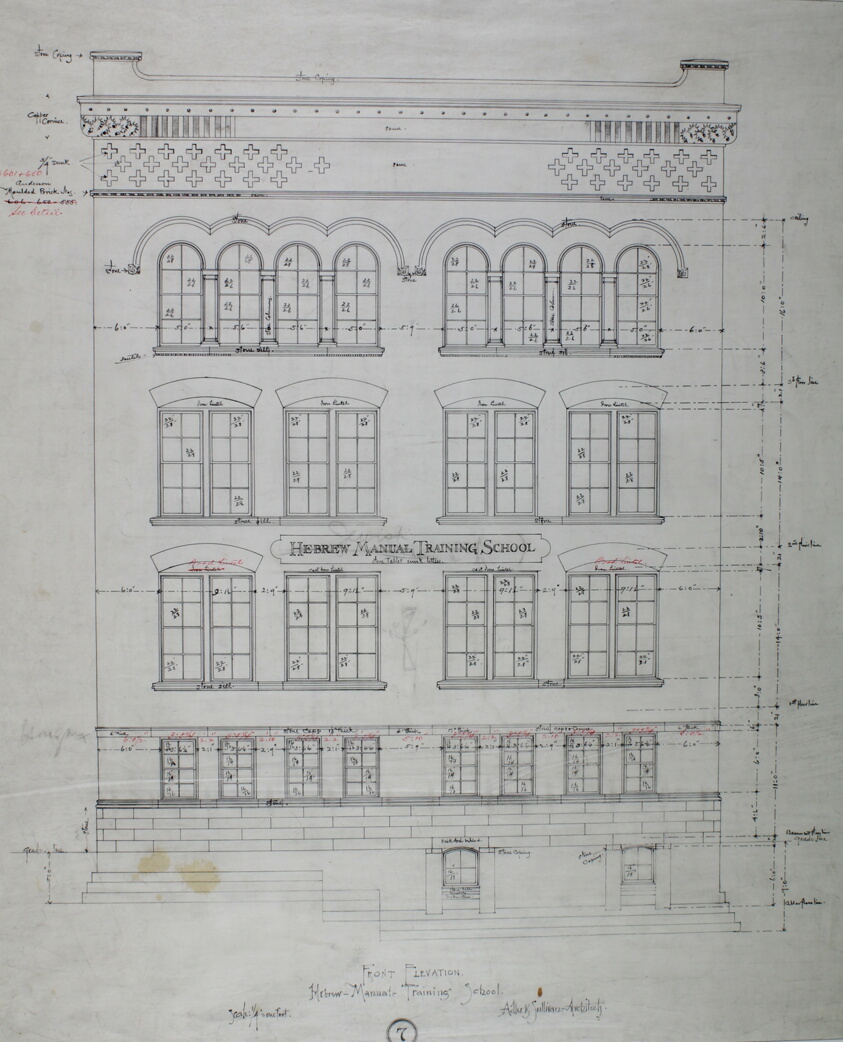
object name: Architectural Drawing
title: Hebrew Manual Training School, Chicago, Illinois, Front Elevation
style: 19th century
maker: Adler and Sullivan; American, 1883-1895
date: 1889/90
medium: Black ink on linen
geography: 12th Place, 554 West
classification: architectural drawing; architecture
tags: schools, Judaism, elevation, Chicago